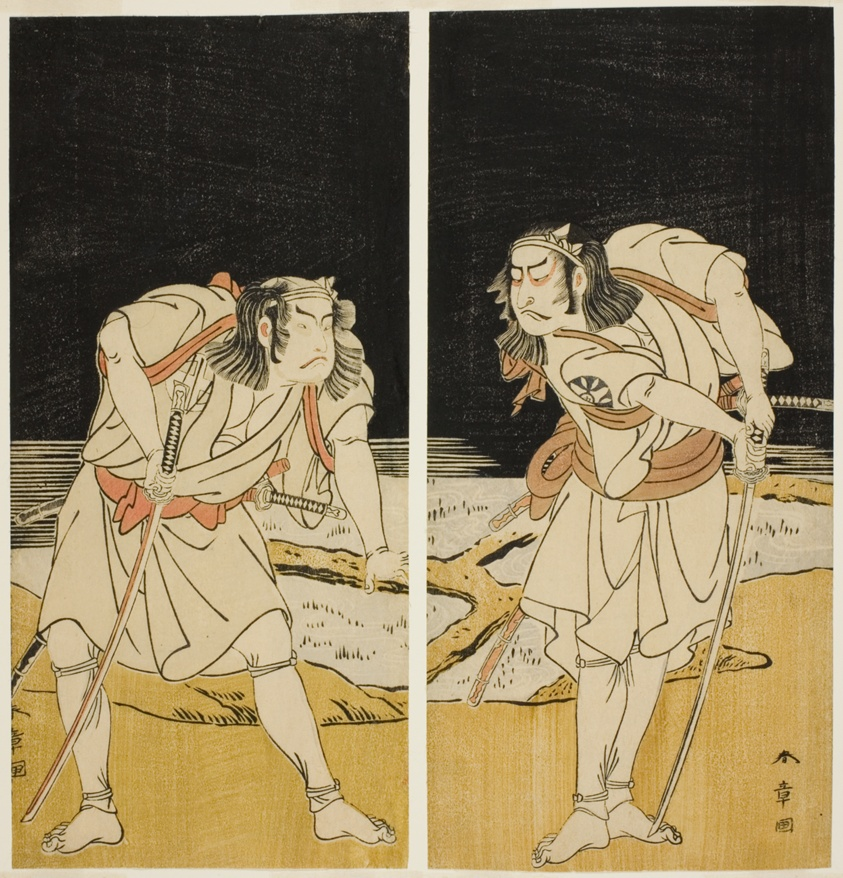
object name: Print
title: The Actors Nakamura Nakazo I as Omi no Kotoda (right), and Otani Hiroji III as Bamba no Chuda (left), in the Joruri "Sono Chidori Yowa no Kamisuki" (The Plovers: Combing Hair at Midnight), from Part Two of the Play O-atsurae-zome Soga no Hinagata (A Soga Pattern Dyed to Order), Performed at the Nakamura Theater from the Tenth Day of the Third Month, 1774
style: Japanese (culture or style)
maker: Katsukawa Shunsho 勝川 春章; Japanese, 1726-1792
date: c. 1774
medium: Color woodblock print; hosoban diptych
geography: Japan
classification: woodblock print; print; asian art